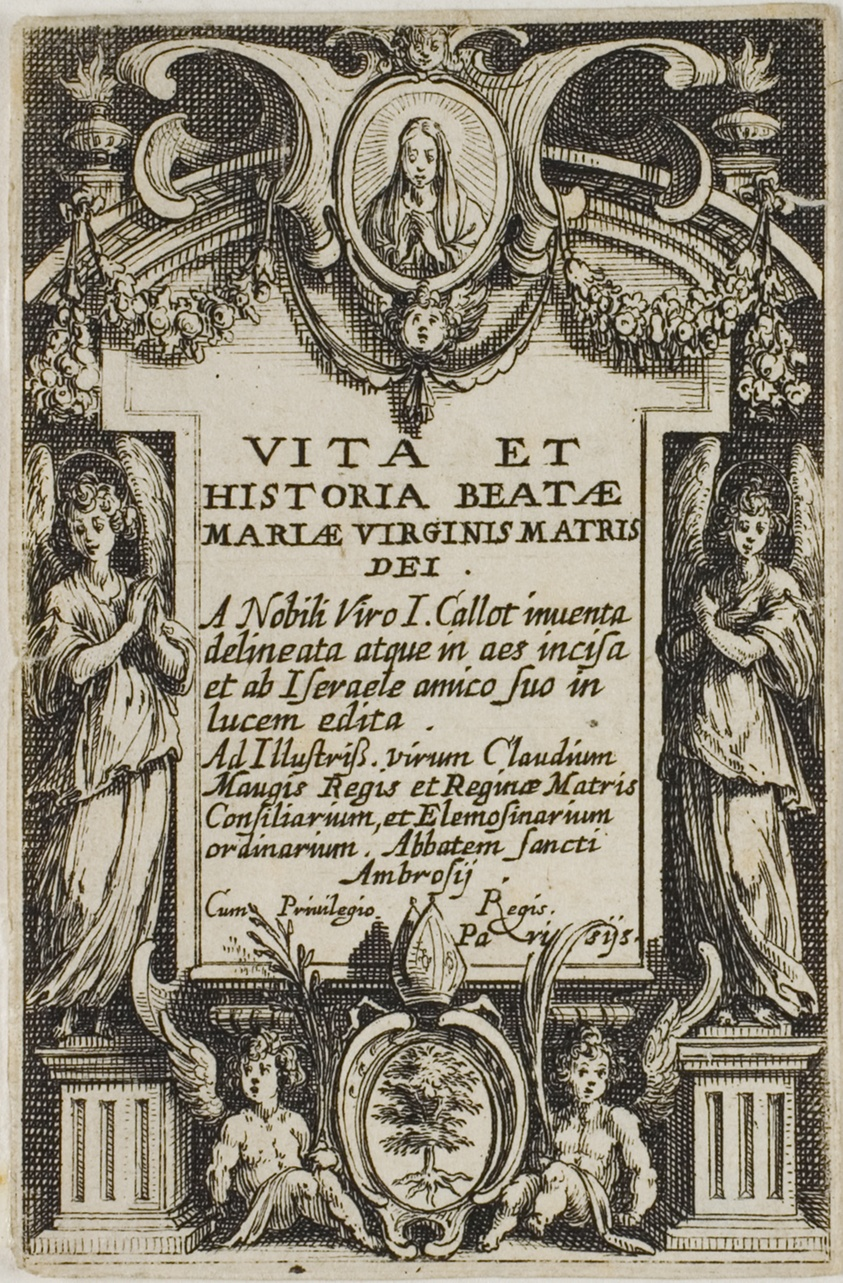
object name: Print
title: Frontispiece, from The Life of the Virgin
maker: Jacques Callot (French, 1592-1635)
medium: Etching on paper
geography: France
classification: etching; print; prints and drawing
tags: Virgin Mary, Christian subjects, mythology, prints and drawings